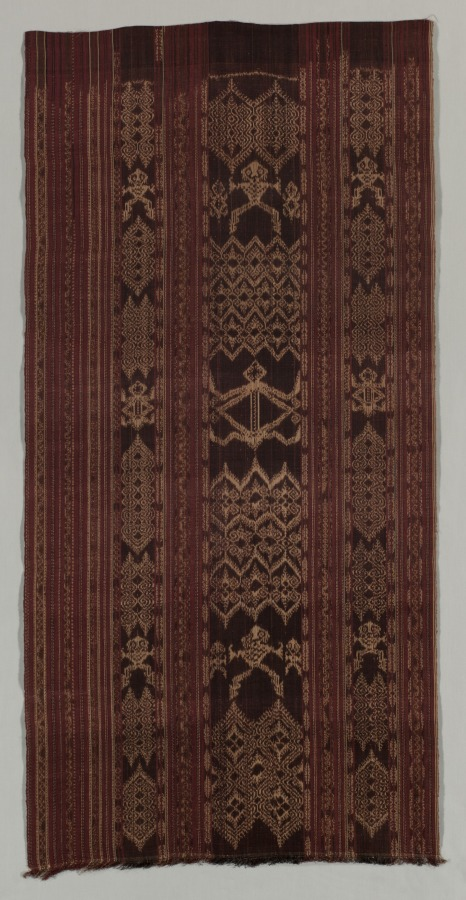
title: Mandaya ikat textile (dagmay)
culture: Philippines, Mindanao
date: c. early 1900s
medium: plain weave hemp, dyed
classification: Textile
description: This textile is a Mandaya abacá ikat cloth woven in southeastern Mindanao. It is made from hand-stripped abacá fibers that are resist-dyed using the Mandaya ikat technique, in which selected warp threads are tightly bound before dyeing to produced patterned sections during weaving. The designs embody Mandaya cosmology and are traditionally associated with protection, fertility, and the presence of umagad (ancestral spirits).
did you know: After weaving, abacá ikat cloths were soaked in iron-rich river mud, which deepens the browns and blacks, strengthens the fiber, and sets the dyes.